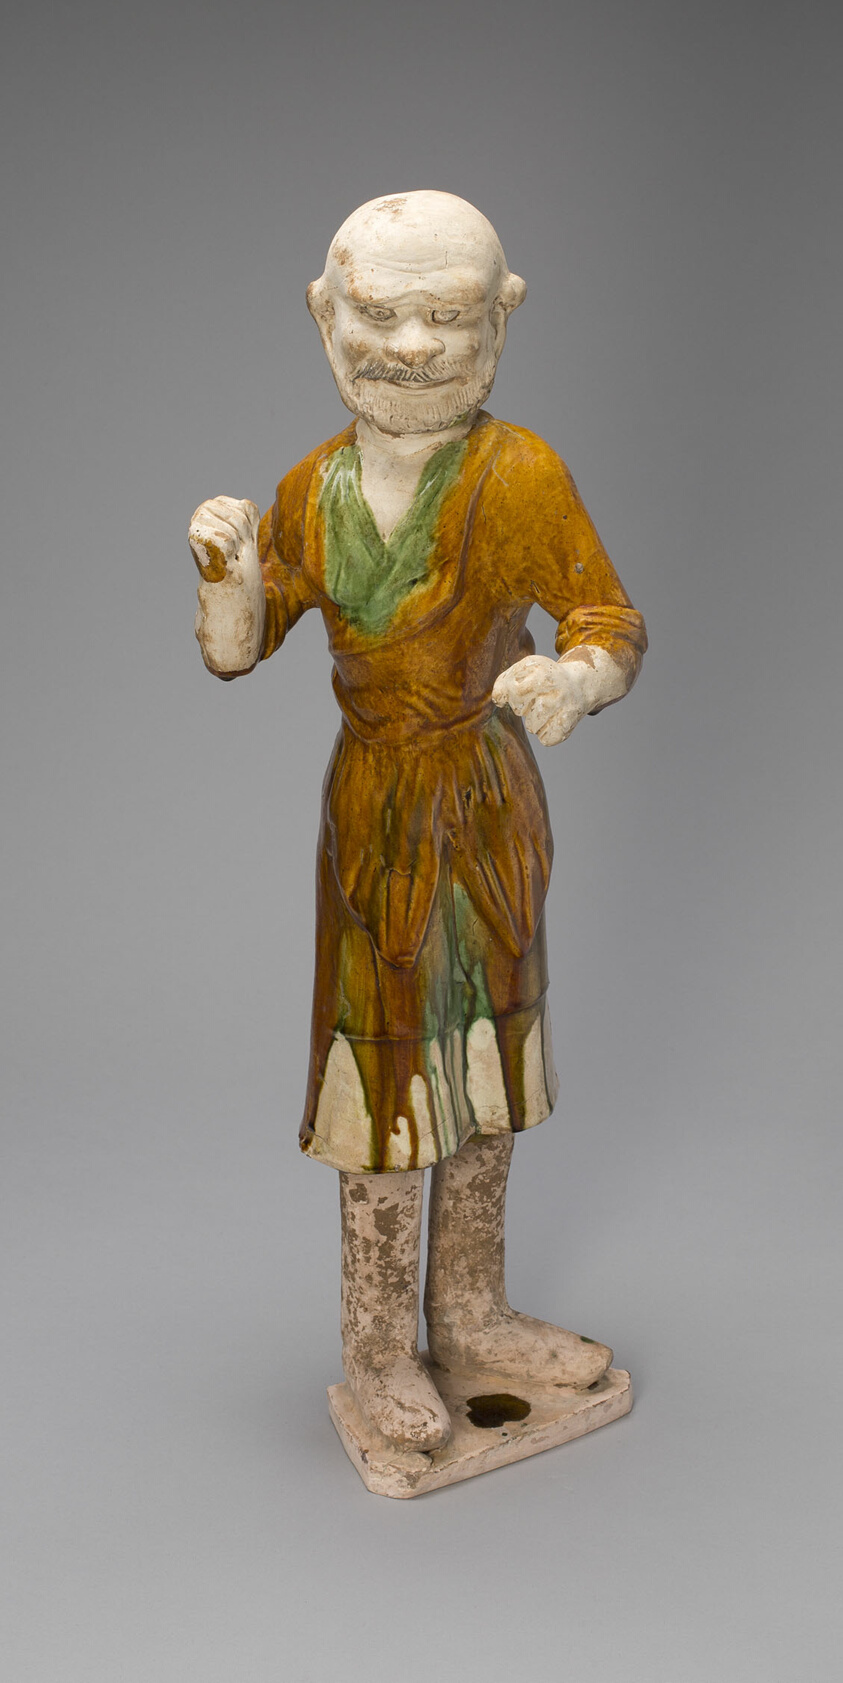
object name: Sculpture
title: Groom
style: Chinese (culture or style)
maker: China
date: Tang dynasty (618–907 A.D.), first half of 8th century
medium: Earthenware with three-color (sancai) lead glazes and traces of pigments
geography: China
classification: earthenware; ceramics; asian art; sculpture